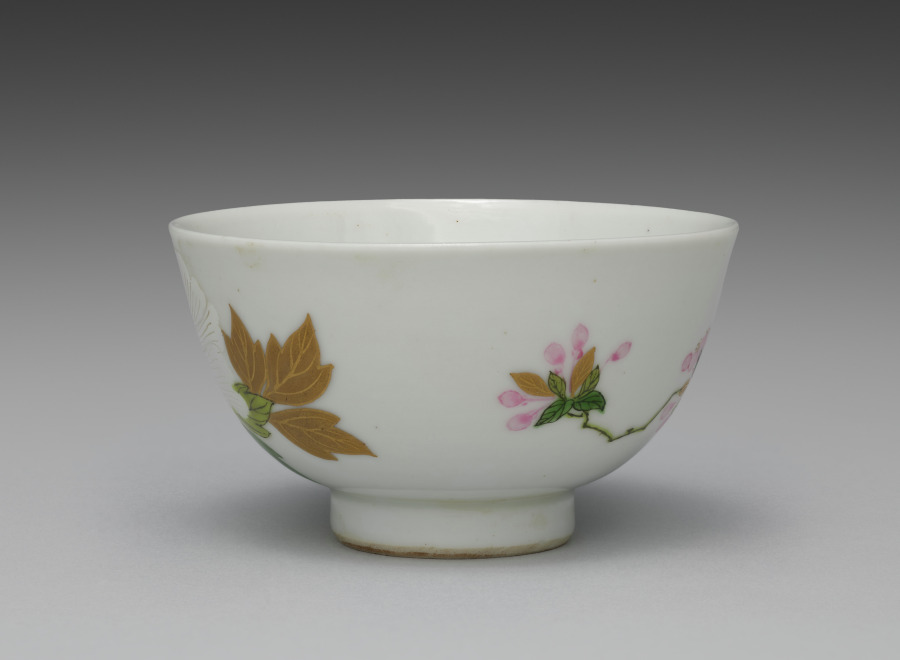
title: Teabowl from Teabowls with Peony and Crabapple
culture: Japan, Meiji period (1868–1912)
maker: Seifū Yohei III (Japanese, 1851–1914)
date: 1893–1914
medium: One from a set of five teabowls; porcelain with underglaze and overglaze color enamels and gold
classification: Ceramic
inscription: 清風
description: Overglaze color enamels are generally called iro-e (literally “color picture”) in the terminology customarily used for porcelain decoration of the Edo period. This set of teabowls is a fine example of Yohei III’s skilled use of the technique, which is identified on this set’s box lid with the alternate phrasing “porcelain with color painting” (jisaiga). Distinct from the way overglaze colors were used in Kakiemon ware from Arita, his designs and applications show a consciousness of porcelain decoration of the Qing dynasty. Here, he combines Chinese models with a sensibility taken from Kyoto ware precedents, including painting with powdered gold (kinrande). The colors used in the bowls are as follows: blue, black, gold, white, light green, green, and pink. The black iron, used for stems and leaf veins, is painted over the glaze. The gold, also painted over the glaze, is used for leaves and the centers of flowers, for solid, glossy lines defining detail, or as a semimatte ground. The white of the peony flower is built up to a low relief over the glaze. Yohei has incised lines of varying widths into the pigment, carving away to the bowl’s surface, to differentiate individual petals and their rippled shapes. The light and dark greens, as well as the pink, are painted over the glaze. Of note is how Yohei has first used thinly applied lines of light green to draw the plum branch before applying the opaque iron black. For the plum buds and flowers, he has used a diluted pink with an opaque pink for outline, both over the glaze. In his later works, Yohei used pink both over and under the glaze in a manner similar to underglaze blue, and it can be challenging in some cases to discern which technique he has used. A lidded container in a private collection has a similar design but is augmented with the inclusion of white and purple magnolia blossoms. In contemplating the original decorative program of a set, of which these teabowls may have been a part, it is worth considering that perhaps not all objects included the full range of motifs. In such cases, the composition of the individual object may be best understood within the context of the extended ensemble. Here, the delicate pink plum on one side of the bowl seems slightly unbalanced with the bold white peony on the other, but when seen with other objects with the magnolia and its additional colors and shapes, it is possible to imagine a set with a complex, balanced design across multiple pieces.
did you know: Blue appears only inside the footring, as a double band of underglaze color.